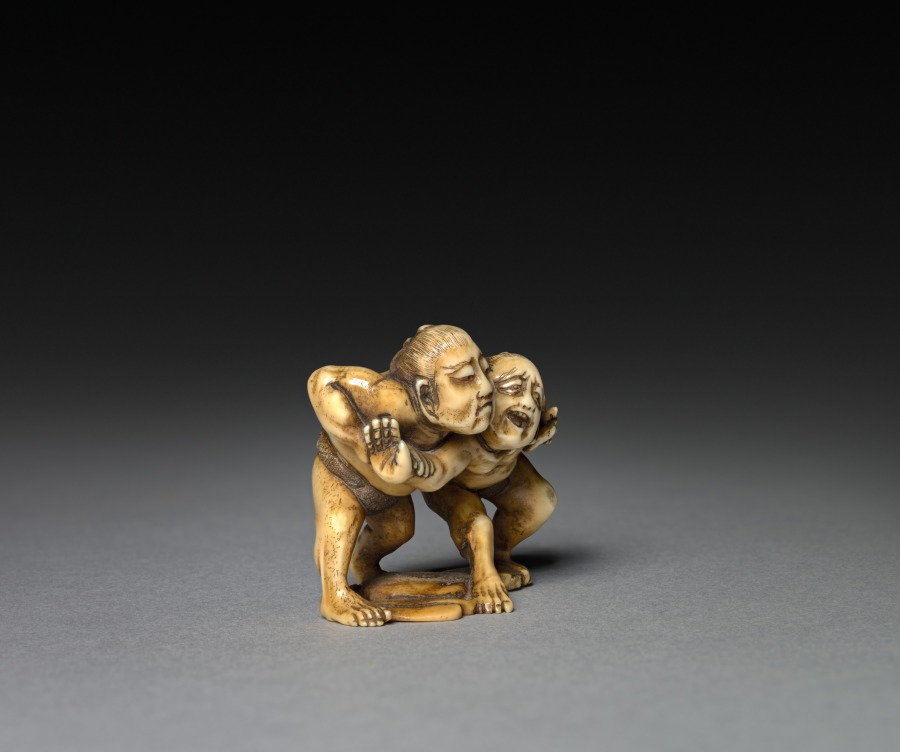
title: Two Wrestlers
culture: Japan, Edo period (1615–1868)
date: early to mid-1800s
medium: ivory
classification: Netsuke